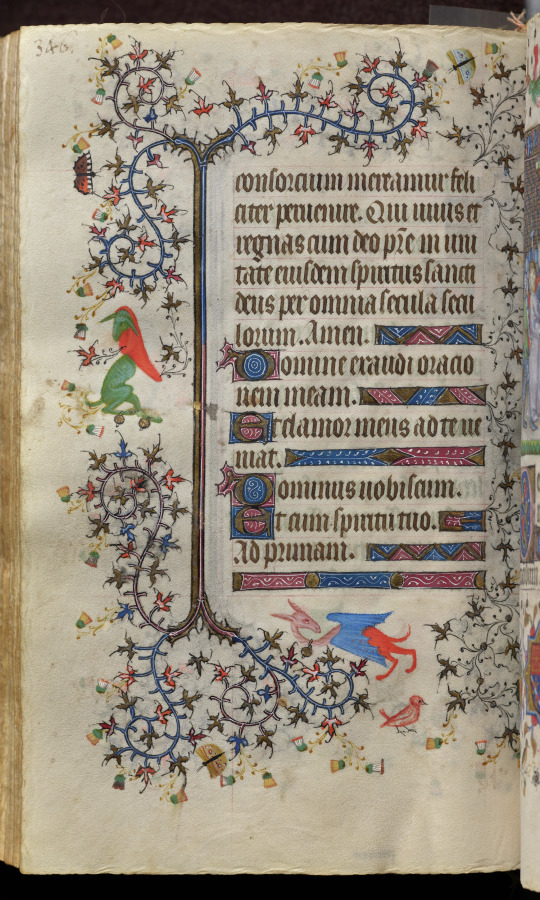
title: Hours of Charles the Noble, King of Navarre (1361-1425): fol. 168v, Text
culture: France, Paris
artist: Master of the Brussels Initials and Associates (French)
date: c. 1405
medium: ink, tempera, and gold on vellum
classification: Bound Volume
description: This precious volume was obviously highly prized by its owner, the French-born King of Navarre, who had his coat of arms painted on no less than twenty folios. Rather than directly commissioning this manuscript from a specific workshop, it seems that Charles the Noble acquired his book of hours -- perhaps ready-made for the luxury market -- while on a trip to Paris in 1404-05. A collaborative effort, six painting styles are evidenced within the pages of this codex, those of two Italians, two Frenchmen, and two Netherlanders. The painter who was responsible for the planning and decoration of the book, and who produced seventeen of the large miniatures, was a Bolognese artist known as the Master of the Brussels Initials. His principal assistant, responsible for most of the borders, was a Florentine who signed his name "Zecho" da Firenze on folio 208 verso.